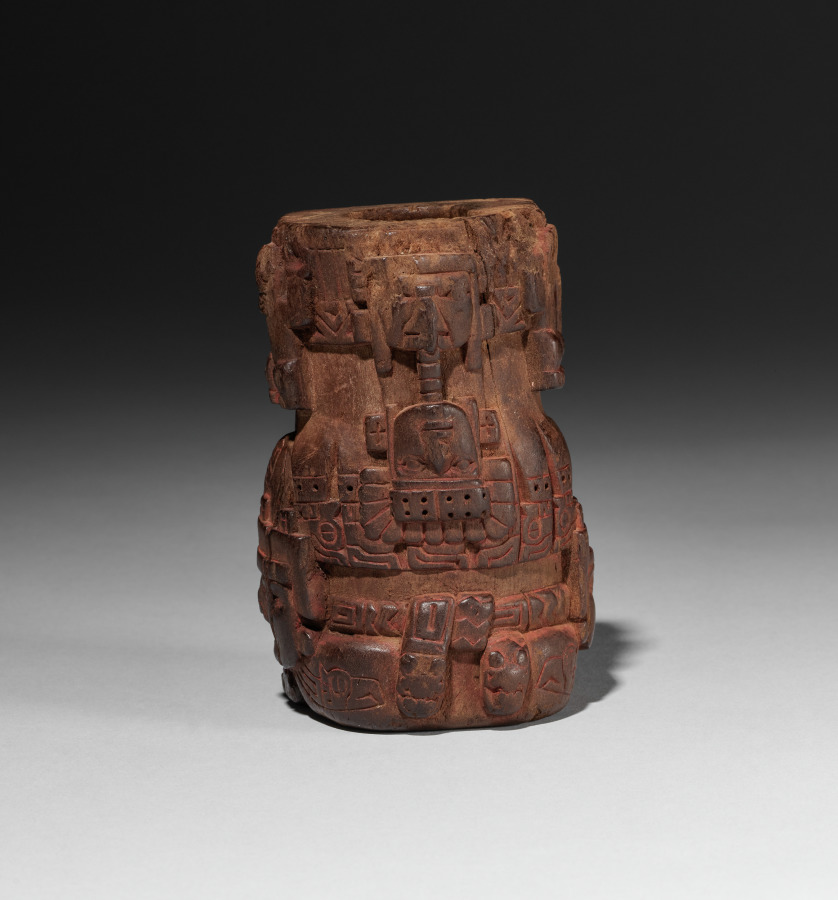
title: Container in the form of a Sacrificer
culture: Peru, Middle Horizon, Wari Culture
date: 770–890 (radiocarbon date, 95% probability)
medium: wood and red pigment (cinnabar)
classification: Wood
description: This container assumes the shape of a magnificent, feline-headed, supernatural sacrificer who draws a knife across the throat of the human it holds in its lap. Severed human heads hang from the feline's belt and dangle by the trachea at the back of its headdress. Sacrifice had a place in Wari religious practice, probably as an unusual and exceptionally precious offering made to entice the benevolence of cosmic forces. Indeed, colonial-period Andean people believed that death was a prerequisite for the renewal of the world.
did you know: Traces of cinnabar, a toxic mercuric sulfide, are visible on the container's surface.